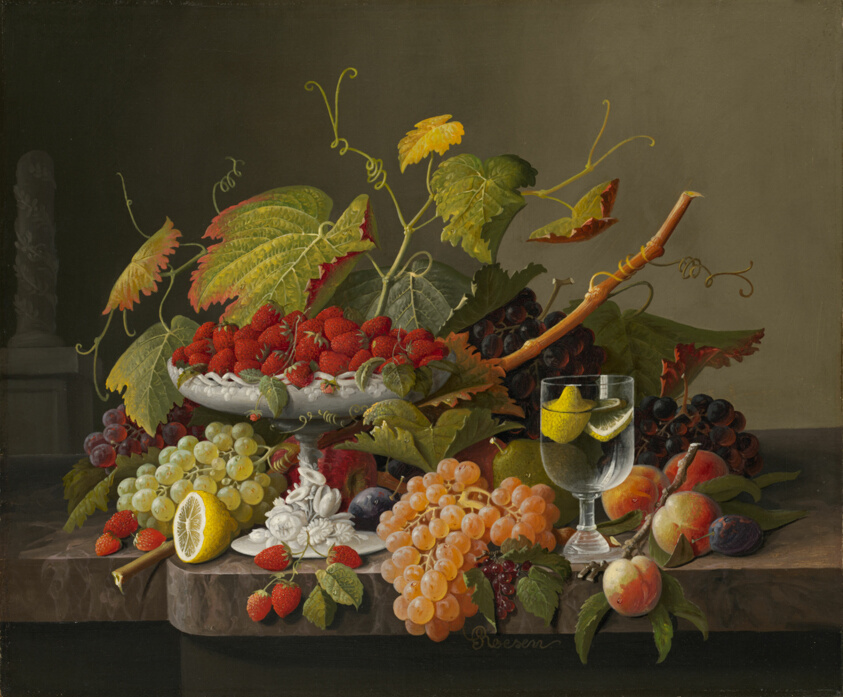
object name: Painting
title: An Abundance of Fruit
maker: Severin Roesen (American, born Germany, 1815/17–1872)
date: c. 1860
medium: Oil on canvas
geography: Germany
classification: oil on canvas; painting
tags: still life, dining, drinking